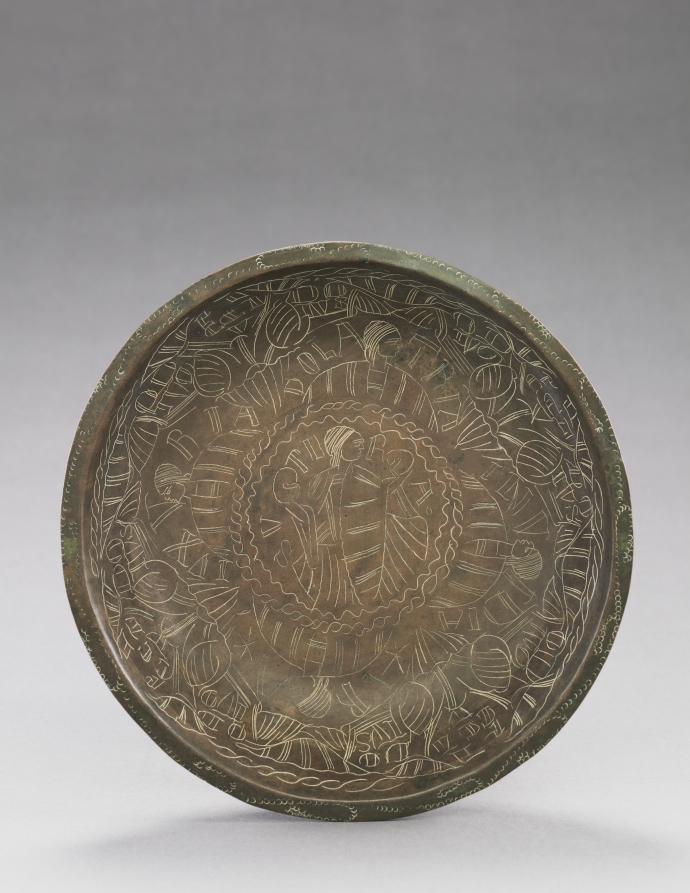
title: Bowl with Engraved Figures of Vices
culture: Germany, Gothic period, 12th century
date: 1150–1200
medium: bronze: spun, hammered, chased, and punched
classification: Metalwork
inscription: at the center of the bowl is a standing female figure with engraved identification: "SVPERBIA" (Pride); along the inner curvature are four bust-length figures with engraved names: "IDOLATRIA" (Idolatry), "INVIDIA" (Envy), "IRA" (Anger); and "LVXVRIA" (Self-Indulgence).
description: At the center of this bowl stands a female figure identified as SUPER[BI]A (pride). Represented along the curvature are four more bust-length figures: [I]DOLATRIA (idolatry), INVIDIA (envy), IRA (anger), and LUXURIA (self-indulgence). Bowls of this type were likely produced in medieval Germany and widely traded throughout northern Europe. Because of the moralistic symbolism employed in their iconographic programs, it has been suggested that such bowls were used in monasteries for hand washing during penitential activities. More recently, it has been suggested that they served as teaching aids for rhetorical instruction in medieval classrooms.